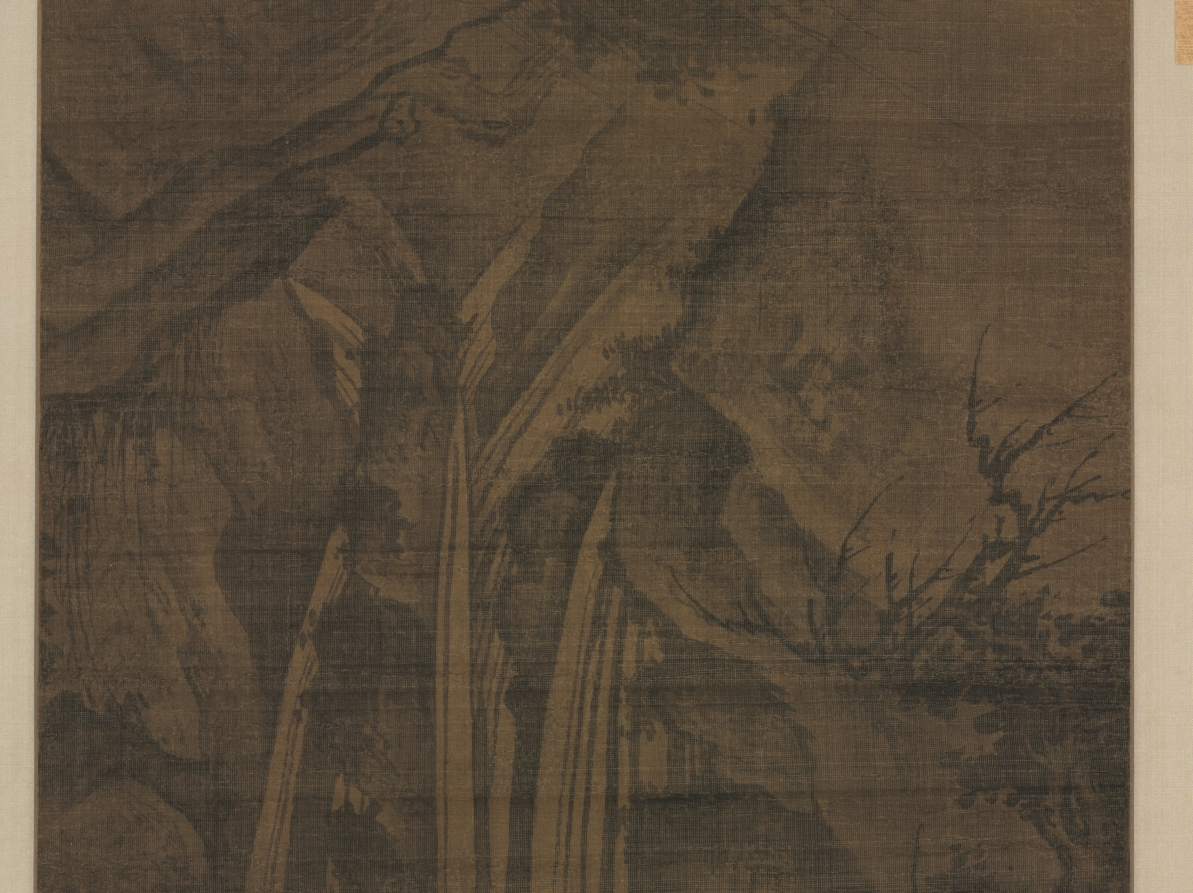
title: Waterfall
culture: China, Song dynasty (960-1279) - Yuan dynasty (1271-1368)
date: 1271–1368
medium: hanging scroll, ink and slight color on silk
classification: Painting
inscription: Label on the mounting with 2 seals of T'ang ? of Pi-ling (16th c.); label on back of mounting of Kü Kuang-hsü (1731-1797). 1 colophon and 8 additional seals: 1 colophon, dated 1625, and 2 seals of Kao P'an-lung (1562-1626); 2 seals of Liu Shu (1759-1816); 1 seal of Pi Lung (late 18th c.); 1 seal of Ts'ao tzu-wen; 2 seals unidentified. WKH